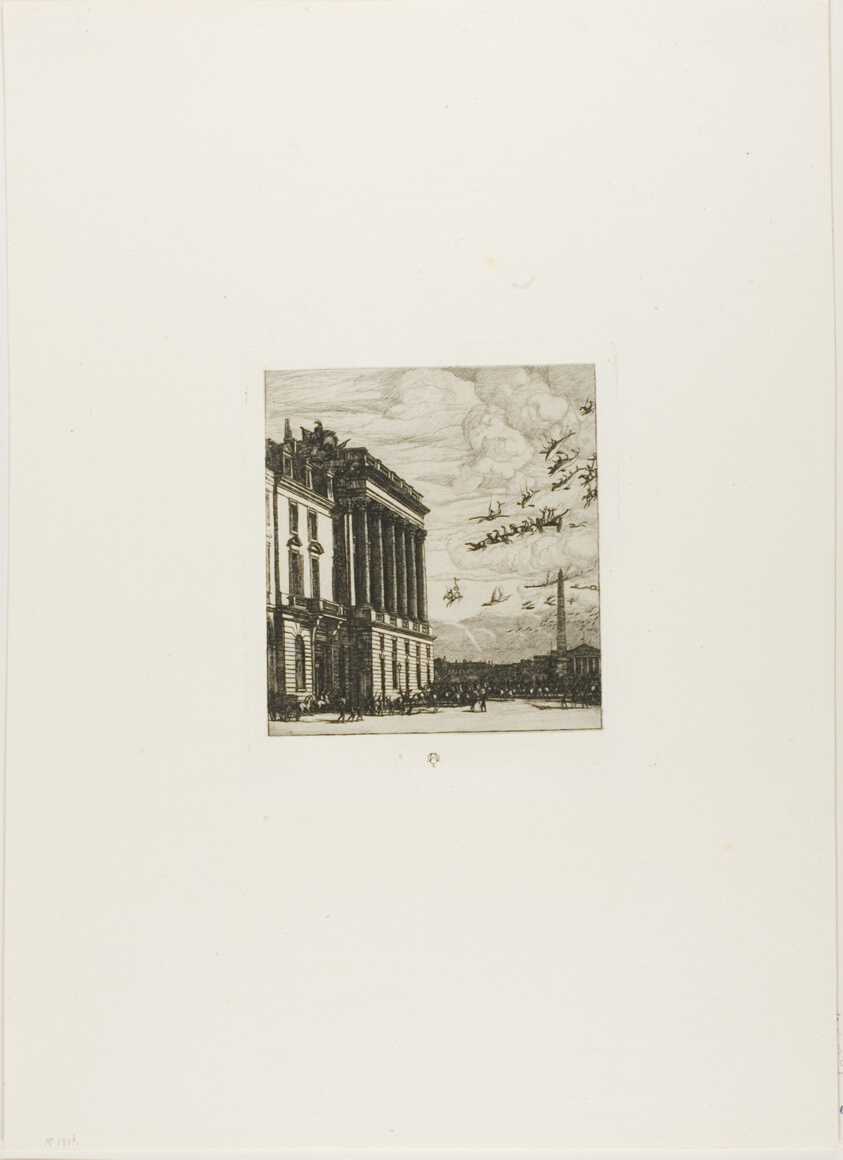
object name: Print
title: The Admiralty, Paris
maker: Charles Meryon (French, 1821-1868)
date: 1865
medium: Etching on ivory laid paper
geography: France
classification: etching; print; prints and drawing